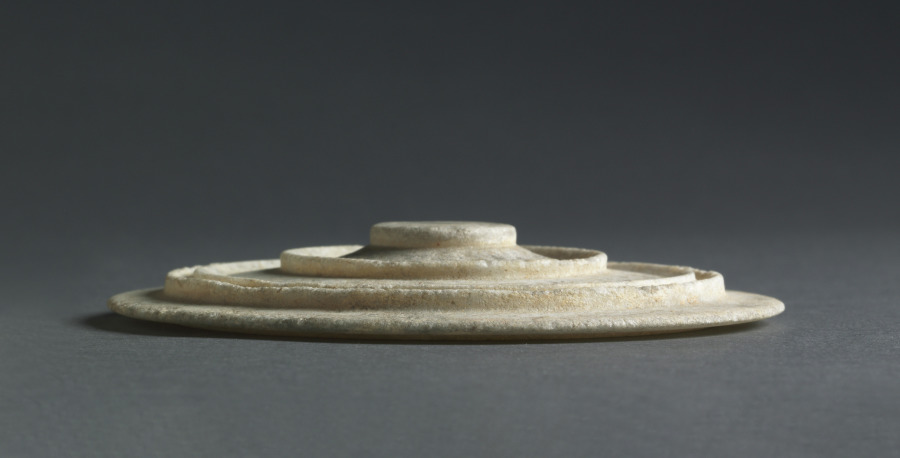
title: Pyxis (lid)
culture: Greece, Attic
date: 400–300 BCE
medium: marble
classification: Stone